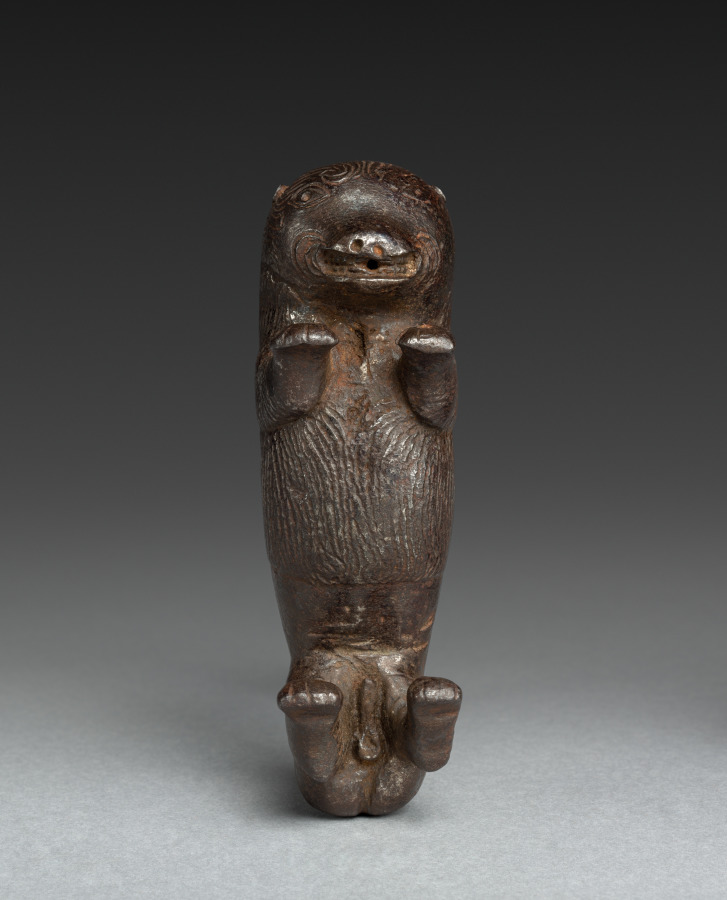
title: Doorknocker in the Form of a Lion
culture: Italy(?)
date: 1400s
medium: wrought iron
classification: Metalwork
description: Doorknockers such as this one were popular accessories for the homes of the wealthy during the Middle Ages. They are found in many different forms. The lion, symbolizing nobility, fortitude, and strength was highly favored.